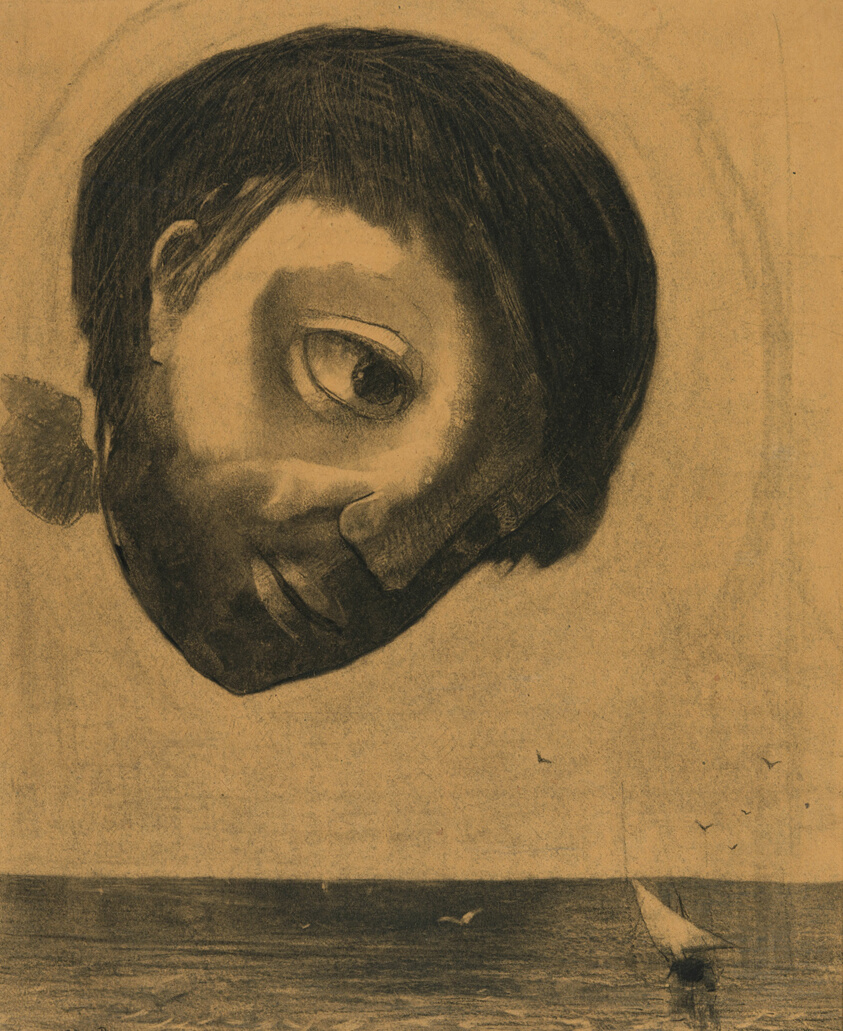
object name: Drawing and Watercolor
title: Guardian Spirit of the Waters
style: Post-Impressionism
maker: Odilon Redon (French, 1840-1916)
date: 1878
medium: Various charcoals, with touches of black chalk, stumping, erasing, incising, and subtractive sponge work, heightened with traces of white chalk, on cream wove paper altered to a golden tone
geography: France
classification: charcoal; drawings (visual works); prints and drawing; paper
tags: mysteries/fantasies, water